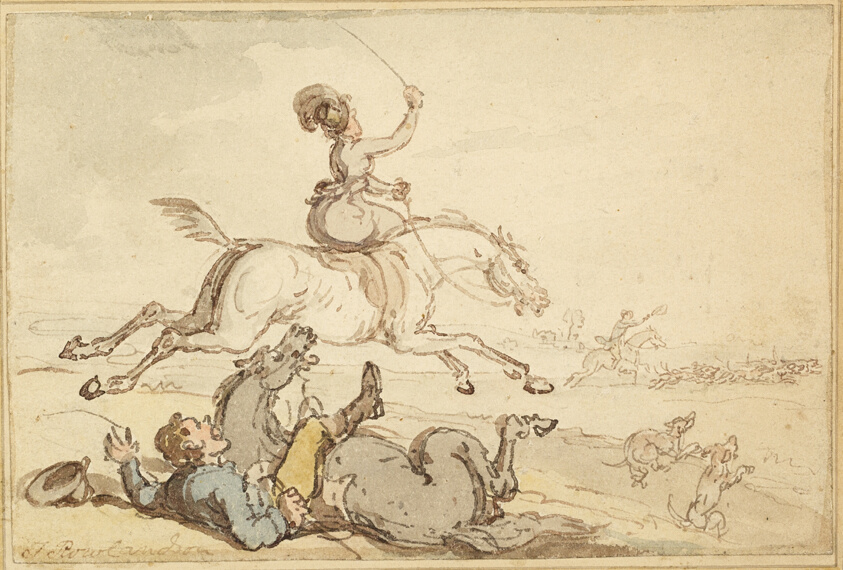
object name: Drawing and Watercolor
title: Rider Thrown at a Hunt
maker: Thomas Rowlandson (English, 1756-1827)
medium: Pen and brown ink with brush and watercolor over traces of graphite, on cream wove paper, laid down on card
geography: England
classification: watercolor; drawings (visual works); prints and drawing